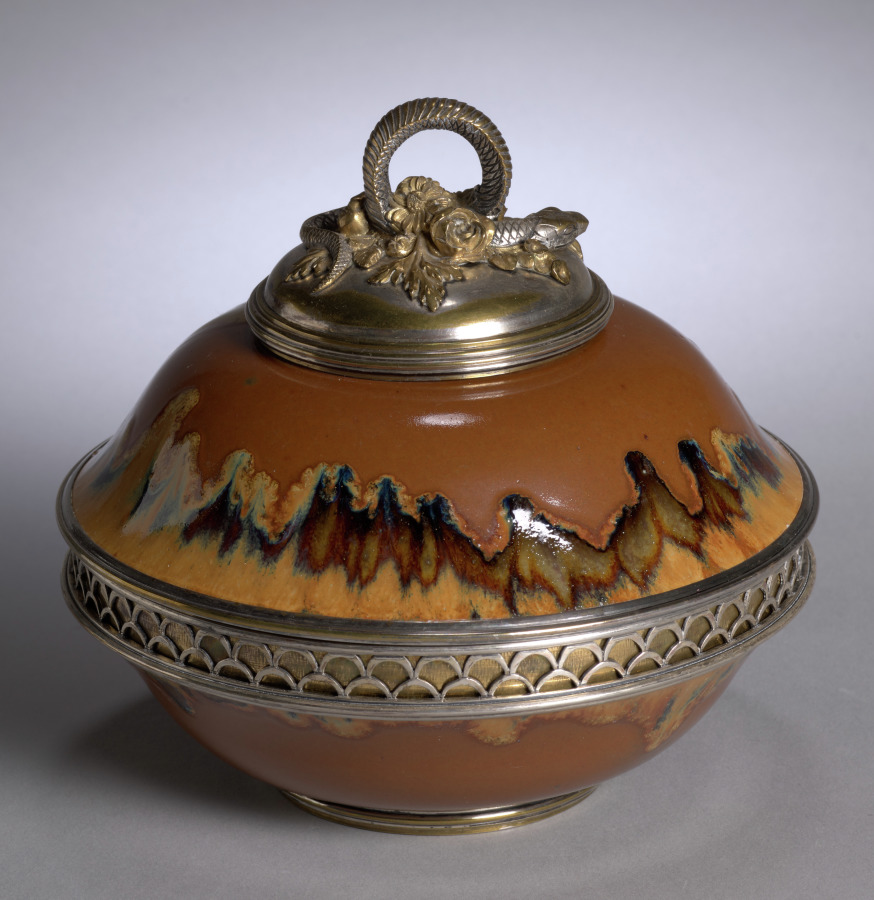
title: Covered Bowl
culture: France, late 19th-early 20th Century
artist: Auguste Delaherche (French, 1857–1940)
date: c. 1899–1900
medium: stoneware with metal mounts, silvered and gilded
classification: Ceramic